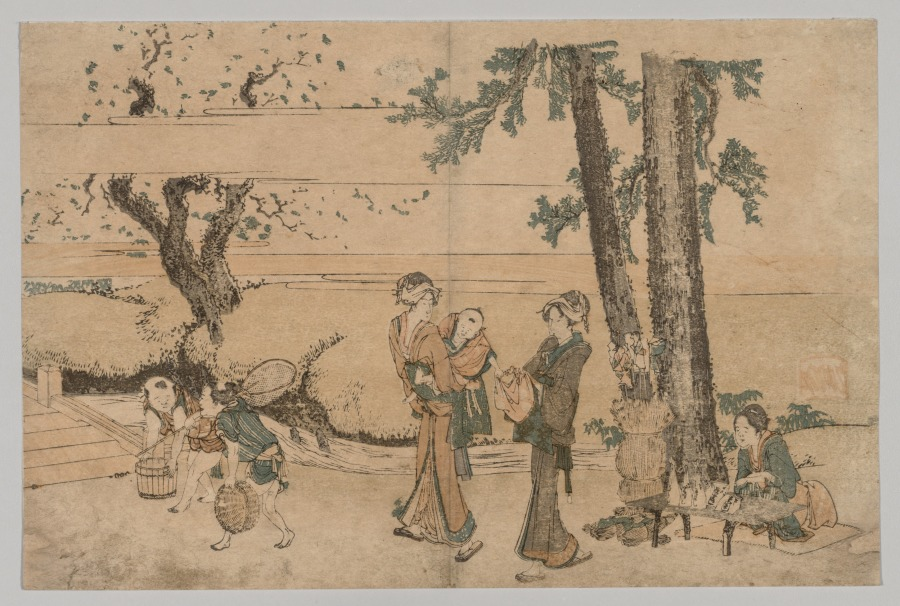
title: Group of Figures near a Brook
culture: Japan, Edo period (1615–1868)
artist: Katsushika Hokusai (Japanese, 1760–1849)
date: 1760–1849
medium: color woodblock print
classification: Print